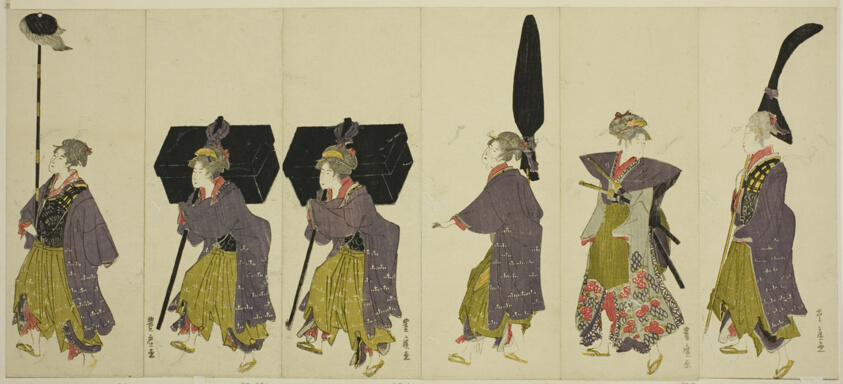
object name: Print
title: Parody of a daimyo procession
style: Japanese (culture or style)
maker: Utagawa Toyohiro (Japanese, 1773-1828)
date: c. 1805/07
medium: Color woodblock prints; 6 of 12 sheets (see 1928.397-402)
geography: Japan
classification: woodblock print; print; asian art